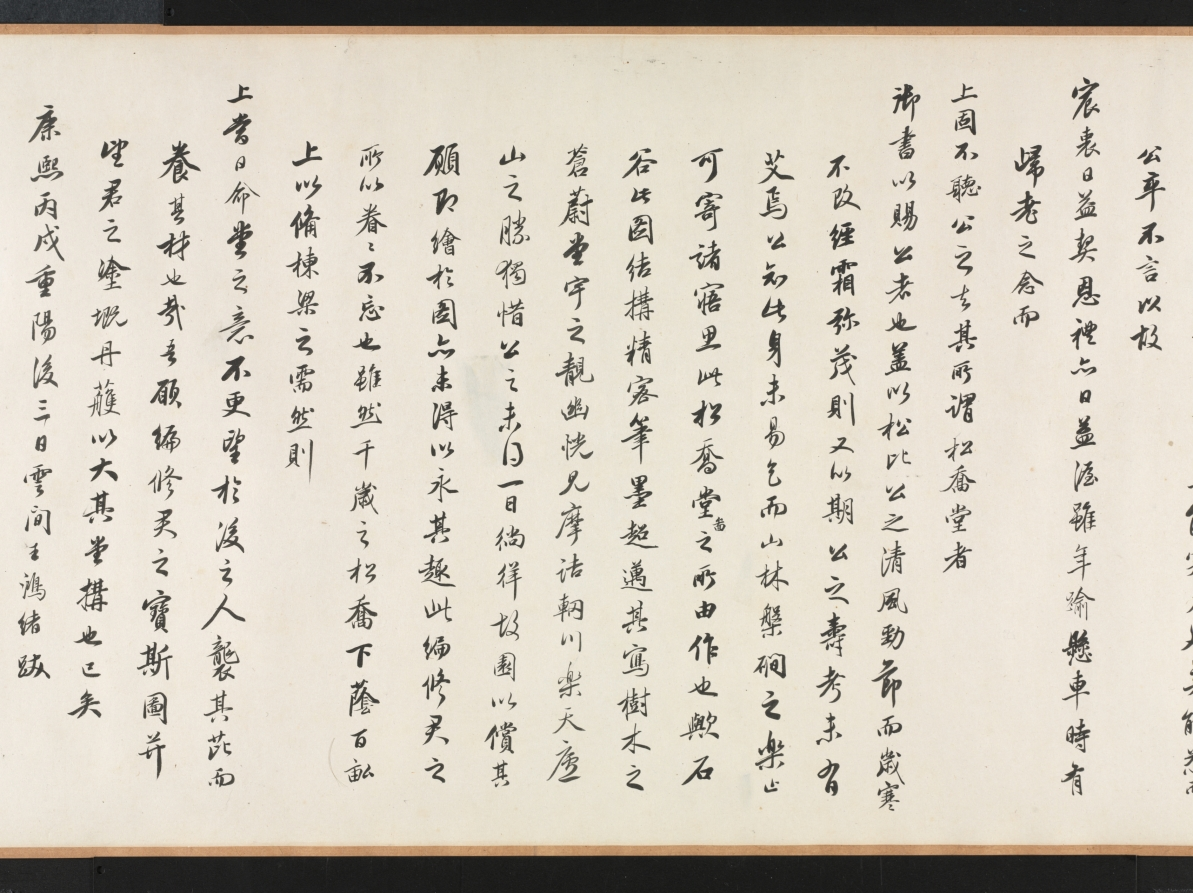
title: Hall of Lofty Pines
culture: China, Qing dynasty (1644-1911)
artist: Wang Hui (Chinese, 1632–1717)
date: 1703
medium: handscroll; ink and color on paper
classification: Painting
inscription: [題] 松喬堂圖 康熙癸未夏六月, 海虞耕煙散人王翬畫。[印]王翬之印; 石谷. [左下] 來青閣; 耕煙野老時年七十有二.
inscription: 松喬堂圖一卷，海虞石谷王君為靜海近公厲少司冦公作也。圖成于癸未之夏。未幾而公遂仙去。公令子今編修君南湖屬余題跋其後。余與公同官侍從，交契最深。側見公之清修純德，蔚為聖天子所眷重。侍直內廷，密勿贊襄，幾二十餘年。蒼生之所以受賜，士林之所以沐德者，天下莫能窺，在廷莫能悉。而公卒不言。以故宸衷日益契，恩禮亦日益渥。雖年逾懸車，時有歸老之念。而上固不聼公之去。其所謂松喬堂者，御書以賜公者也。蓋以松比公之清風勁節，而歲寒不改，經霜彌茂。則又以期公之壽考未有艾焉。公知此身未易乞，而山林槃磵之樂，止可寄諸寤思。此松喬堂圖之所由作也歟。石谷此圖，結構精密，筆墨超邁。其寫樹木之蒼蔚，堂宇之靚幽。恍見摩詰輞川樂天廬山之勝。獨惜公未得一日徜徉故園以償其願。即繪於圖亦未得以永其趣，此編修君之所以眷眷不忘也。雖然千歳之松喬，下蔭百畝，上以修棟梁之需。然則上當日名堂之意，不更望於後之人襲其芘而養其材也哉。吾願編修君之寶斯圖。并望君之塗塈丹雘，大其堂構也已矣。 康熈丙戍重陽三日，雲間王鴻緒跋。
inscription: 10 additional seals: 1 seal of Li Duna 勵杜納 (1628–1703); 4 seals of Zha Ying 查瑩 (jinshi of 1766); 5 seals of Li Yun (dates unknown).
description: Wang Hui 王翬, a leading painter in the orthodox school of the early Qing dynasty (1644–1911), was commissioned to paint this landscape with a country estate for Li Duna 勵杜納 (1628–1703), vice minister of justice in Emperor Kangxi’s court. The emperor had honored Li by granting him a piece of calligraphy with the name of Li’s retirement retreat, “Hall of Lofty Pines.” He drew a comparison between pines and Li’s upright character, resilience, and longevity. Wang Hui’s painting was supposed to allow Li to imagine living in a beautiful, secluded compound among the hills and pines. Sadly, Li died before seeing the completed painting and before receiving the emperor’s permission to retire. The landscape begins with peaceful riverbanks and low hills. The pines around the estate in the middle of the handscroll are truly lofty, some stretching even beyond the frame of the painting. Li Duna, the estate’s owner, is shown twice in his serene mountain retreat: first approaching the entrance to the compound with two servants at the right, and then later in the scroll, to the left, reading in the comfort of an inner room.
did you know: One servant carries the estate owner's carefully wrapped qin, a type of zither.